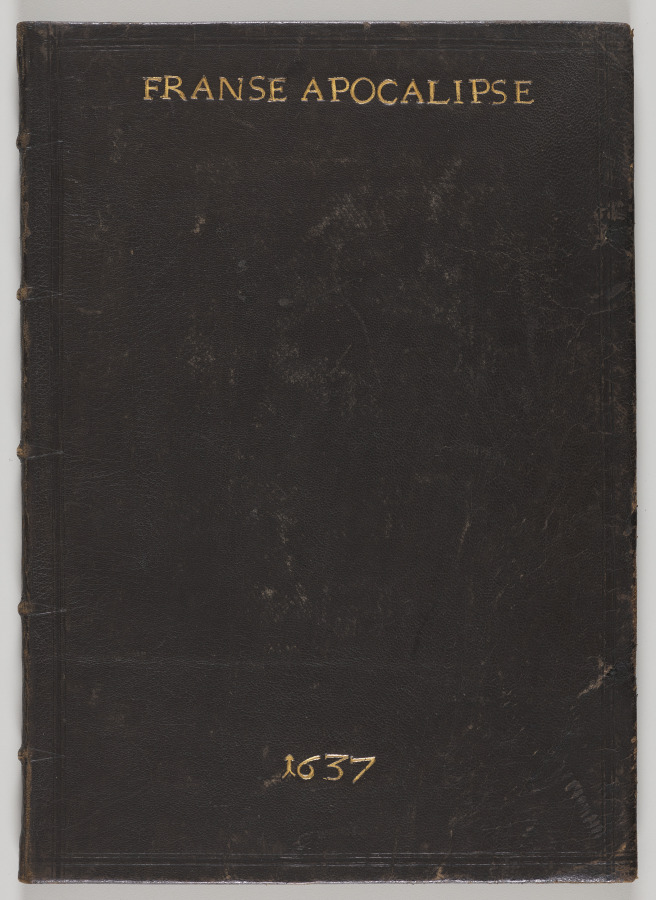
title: The Apocalypse (bound volume)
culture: France, 16th century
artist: Jean Duvet (French, 1485–1561)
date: 1555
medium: engraving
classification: Print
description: This print is part of a bound volume of works illustrating the a narrative of the Apocalypse, taken from the Revelation of Saint John in the Bible. The 23 engravings in the series occupied the artist for a number of years and represent his greatest artistic achievement. The museum's volume is one of only seven known complete sets. Jean Duvet was one of the first major printmakers in France and one of the most original artists of the 1500s. Although he worked mostly in the provincial city of Langres, he became aware of Italian art through the circulation of prints—notably those of Marcantonio Raimondi. His solidly modeled human figures reflect the influence of the Italian High Renaissance. Duvet, however, developed an idiosyncratic, highly artificial style with crowded compositions that ignore rational space in favor of ornamental surface patterns.